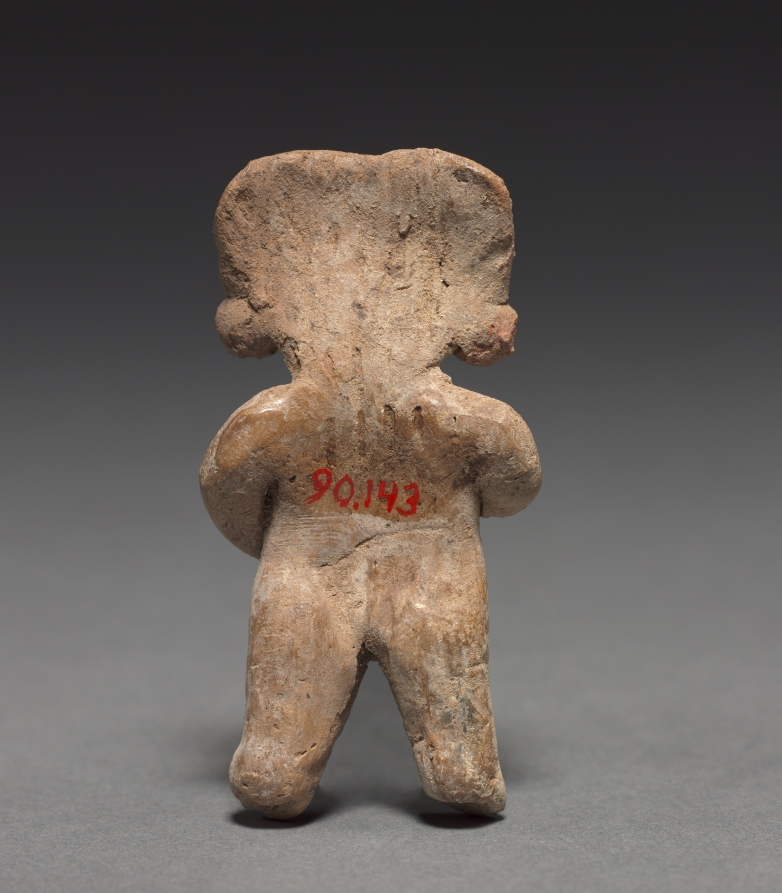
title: Female Holding A Bowl Figurine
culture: Mesoamerica, Guanajuato or Michoacán, Chupícuaro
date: 600 BCE–250 CE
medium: Ceramic, pigment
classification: Sculpture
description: Small, solid, hand-modeled figurines were a staple of the early Mesoamerican artistic repertoire. Made in distinctive styles corresponding to geographic regions, they likely were used in a variety of contexts, including rites to assure health, fertility, and prosperity. This example is from the Chupícuaro region, north of modern-day Mexico City.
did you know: Small, solid, hand-modeled figurines were a staple of the early Mesoamerican artistic repertoire.